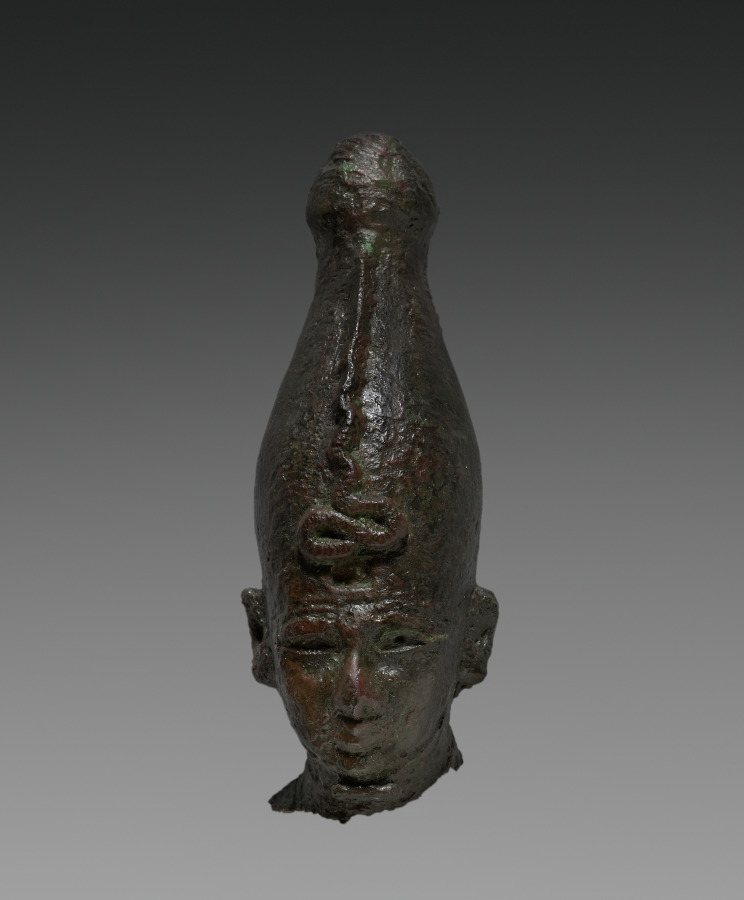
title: Statuette of Osiris (head)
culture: Egypt, Late period (715–332 BCE), Dynasty 26 or later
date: 664–525 BCE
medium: black copper (?), hollow cast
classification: Sculpture